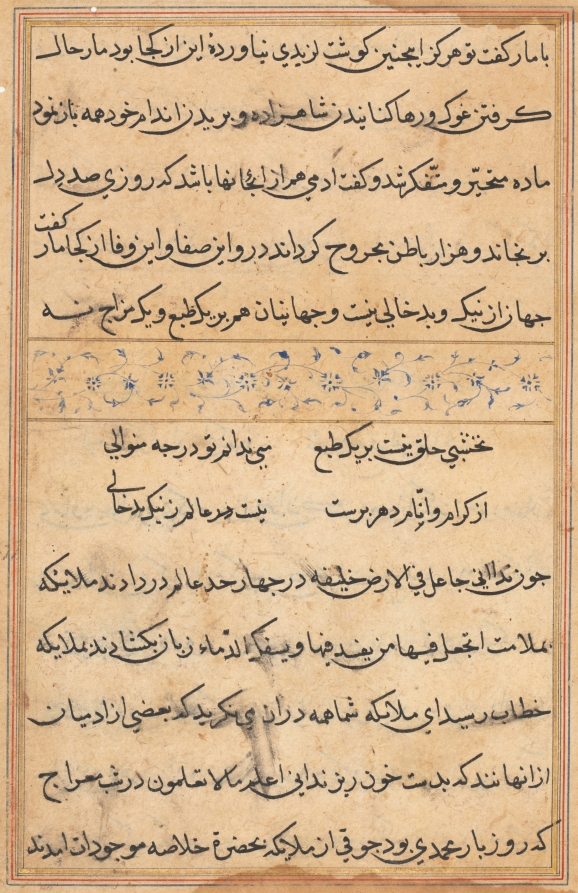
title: Page from Tales of a Parrot (Tuti-nama): text page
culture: Mughal India, court of Akbar (reigned 1556–1605)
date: c. 1560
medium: gum tempera, ink, and gold on paper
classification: Painting